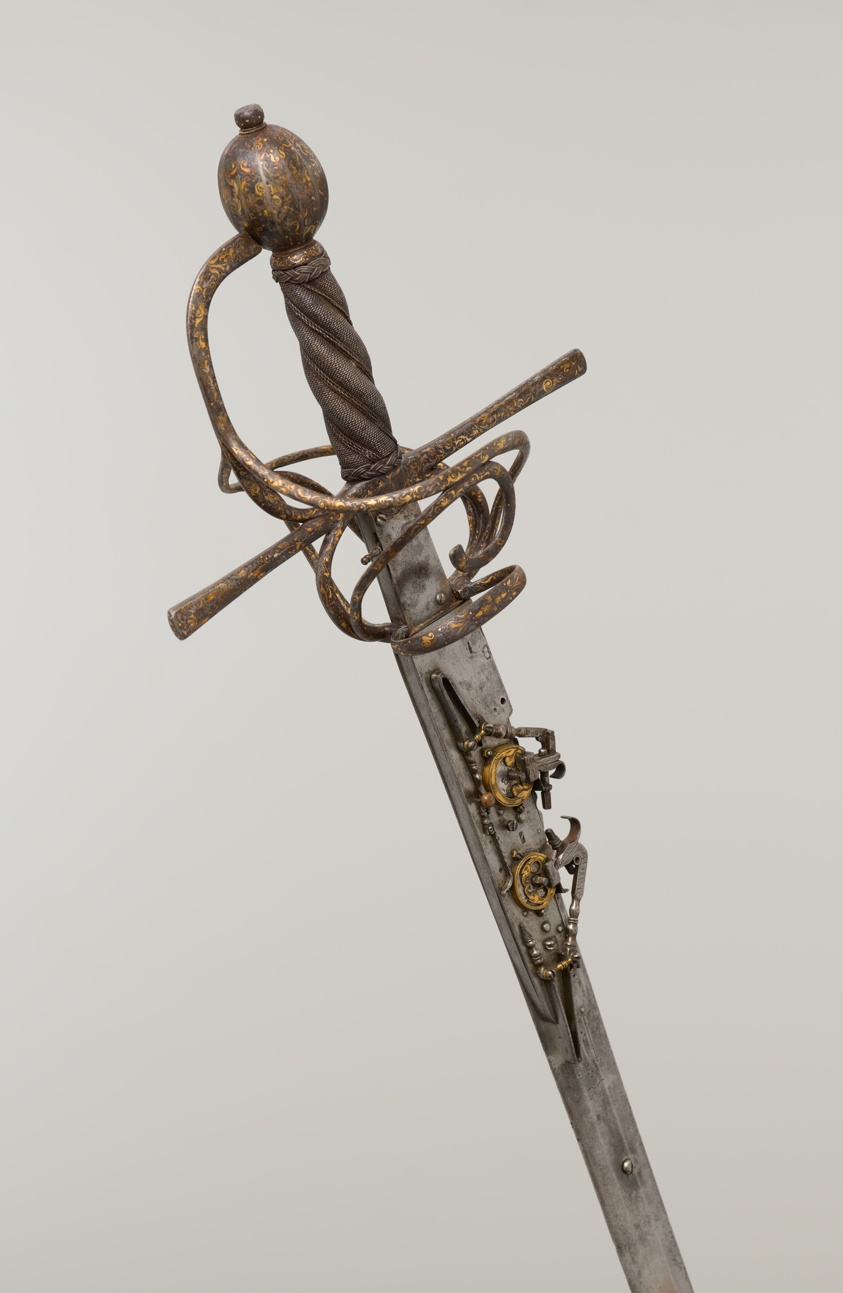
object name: Arms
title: Rapier Combined with two Wheel-Lock Pistols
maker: German; Bladesmith: Hernandez Sebastian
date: c. 1600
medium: Steel, iron, brass, gold, silver, gilding, and wood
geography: Germany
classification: combination weapon; arms; arms and armor